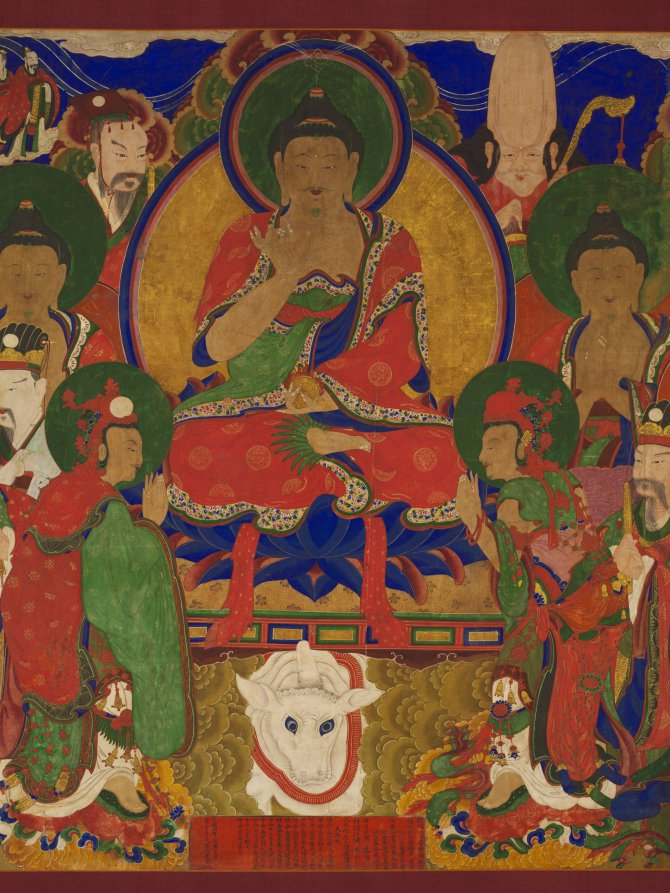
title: The Assembly of Tejaprabha Buddha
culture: Korea, Joseon dynasty (1392–1910)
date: 1878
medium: hanging scroll; ink, color, and gold on silk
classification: Painting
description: The main deity seated at the center is Tejaprabha, the Buddha of Radiant Light. Blazing beams of light emanating from its celestial body are this deity’s weapon to crush all kinds of calamities. Coincidently, when this painting was created, Korea was experiencing a height of foreign military aggressions, including invasions by the French (1866) and the US (1871). The inscription at the bottom center states that a group of ladies from the royal court commissioned the scroll to wish for the well-being of their families. During the late Joseon dynasty, Korean women became largely marginalized. Nevertheless, they remained important patrons of Buddhist art and architecture, voicing their concerns for their country and families in peril.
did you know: The central Buddha of Radiant Light is flanked by two attendant bodhisattvas, Sunlight and Moonlight, each in reverence posture.